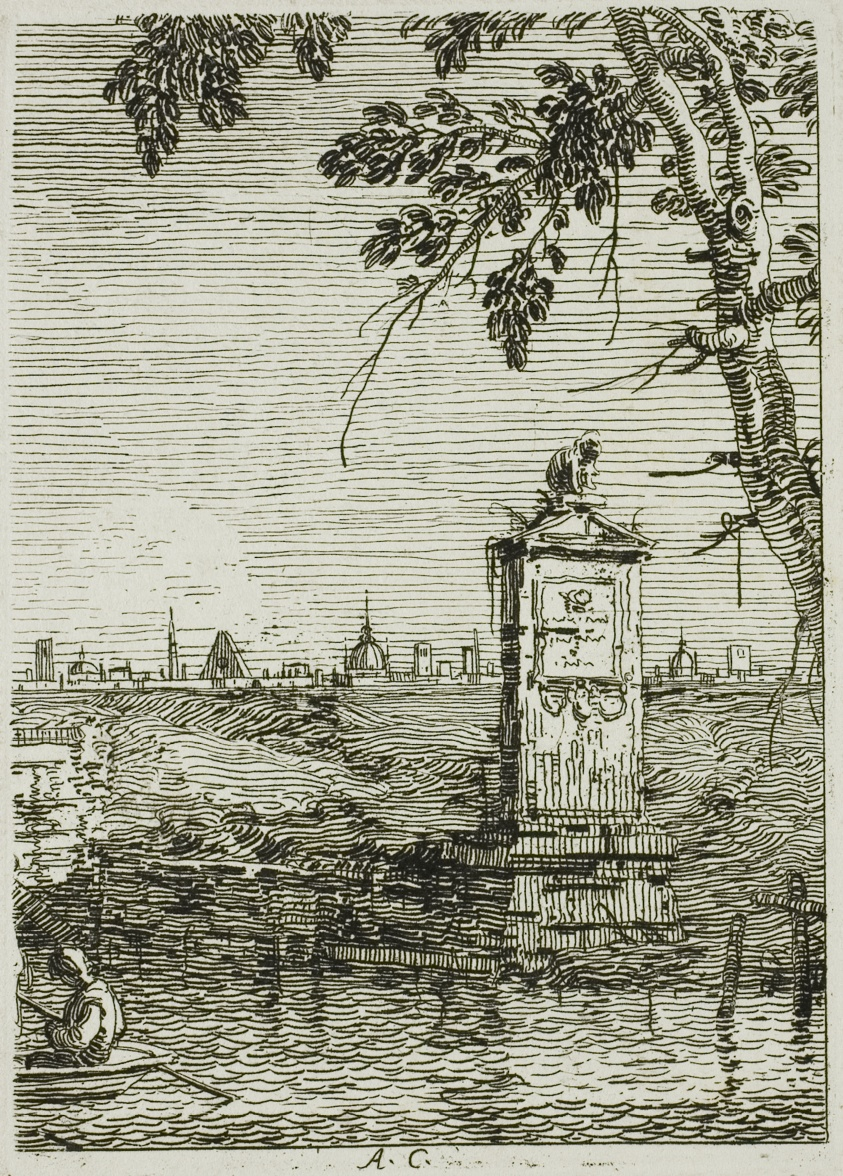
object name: Print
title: The Little Monument, from Vedute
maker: Canaletto (Italian, 1697-1768)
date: 1735/44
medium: Etching in black on ivory laid paper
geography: Italy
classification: etching; print; prints and drawing